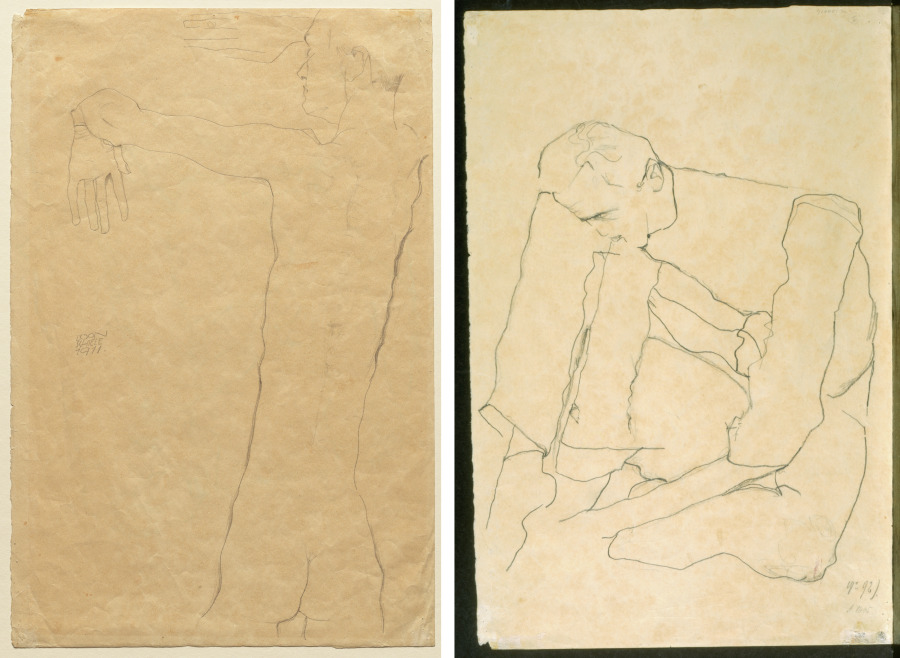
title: Nude Man with Raised Arms (recto) Seated Man (verso)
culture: Austria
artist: Egon Schiele (Austrian, 1890–1918)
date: 1911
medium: graphite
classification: Drawing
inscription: signed, left center, in graphite: EGON / SCHIELE / 1911.